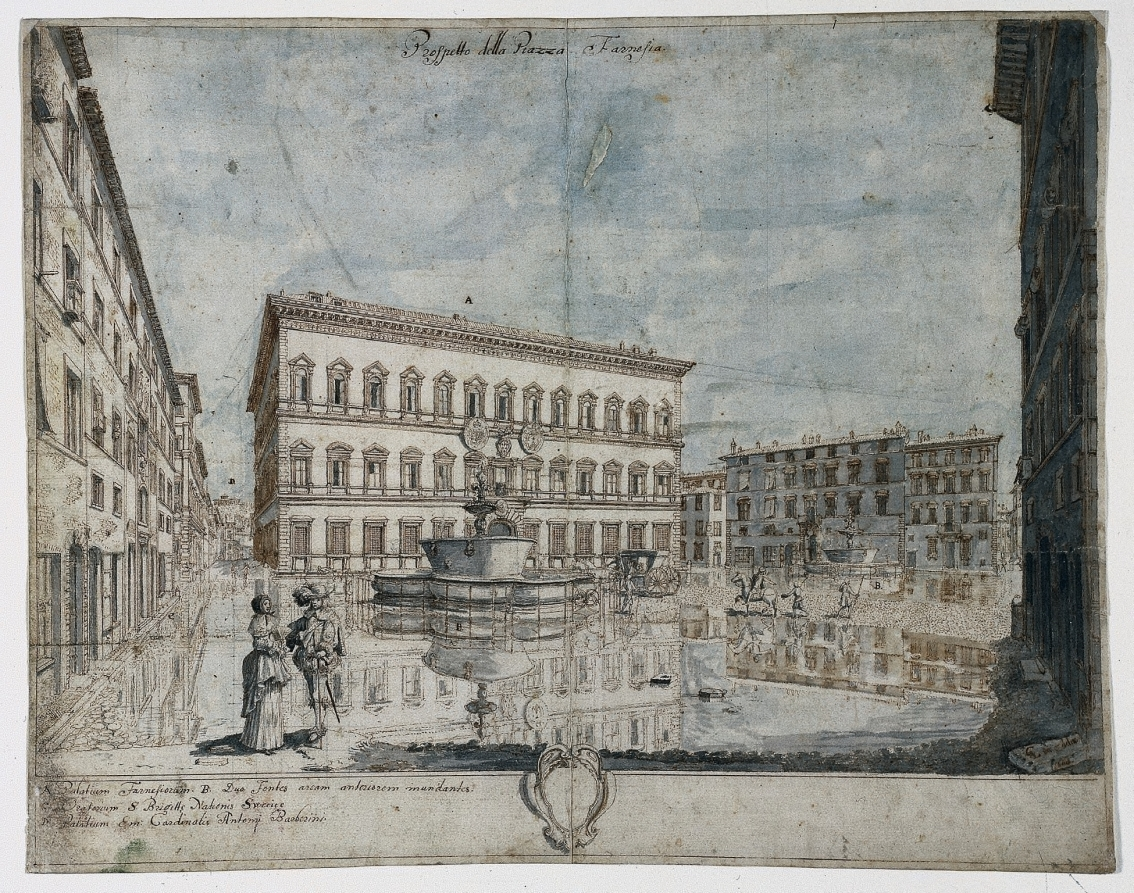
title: Eighteen Views of Rome: The Piazza Farnese (recto)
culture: Flanders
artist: Lievin Cruyl (Flemish, c. 1640-c. 1720)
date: 1664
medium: pen and brown ink and brush and gray and blue wash over graphite; squared in graphite (two figures in the foreground); framing lines in brown ink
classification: Drawing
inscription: signed, lower right, in brown ink: [artist's monogram: LC] inv. et delin. / 1664. ; by artist, upper center, in brown ink: Prospetto della Piazza Farnesia. ; by artist, througout composition, in brown ink: [the letters A-D] ; by artist, lower left, in brown ink: A. Palatium Farnesiorum. B. Duo Fontes aream anteriorem mundantes. / C. Oratorium S. Brigitte Nationis Sweciæ / D. Palatium Em: Cardinalis Antonij Barberini.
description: Flemish artist Lieven Cruyl made a number of drawings of emblematic vistas of Rome for the Roman publisher Giovanni Battista de Rossi, of which ten were published as etchings in 1666. The Piazza Farnese features architecture designed by Michelangelo, who completed the Palazzo Farnese after the death of its original designer, Antonio da Sangallo, in 1546. His main contribution was the third story and the significantly protruding cornice at the top of the facade, which dramatically hangs over the front of the building, like sculpture.